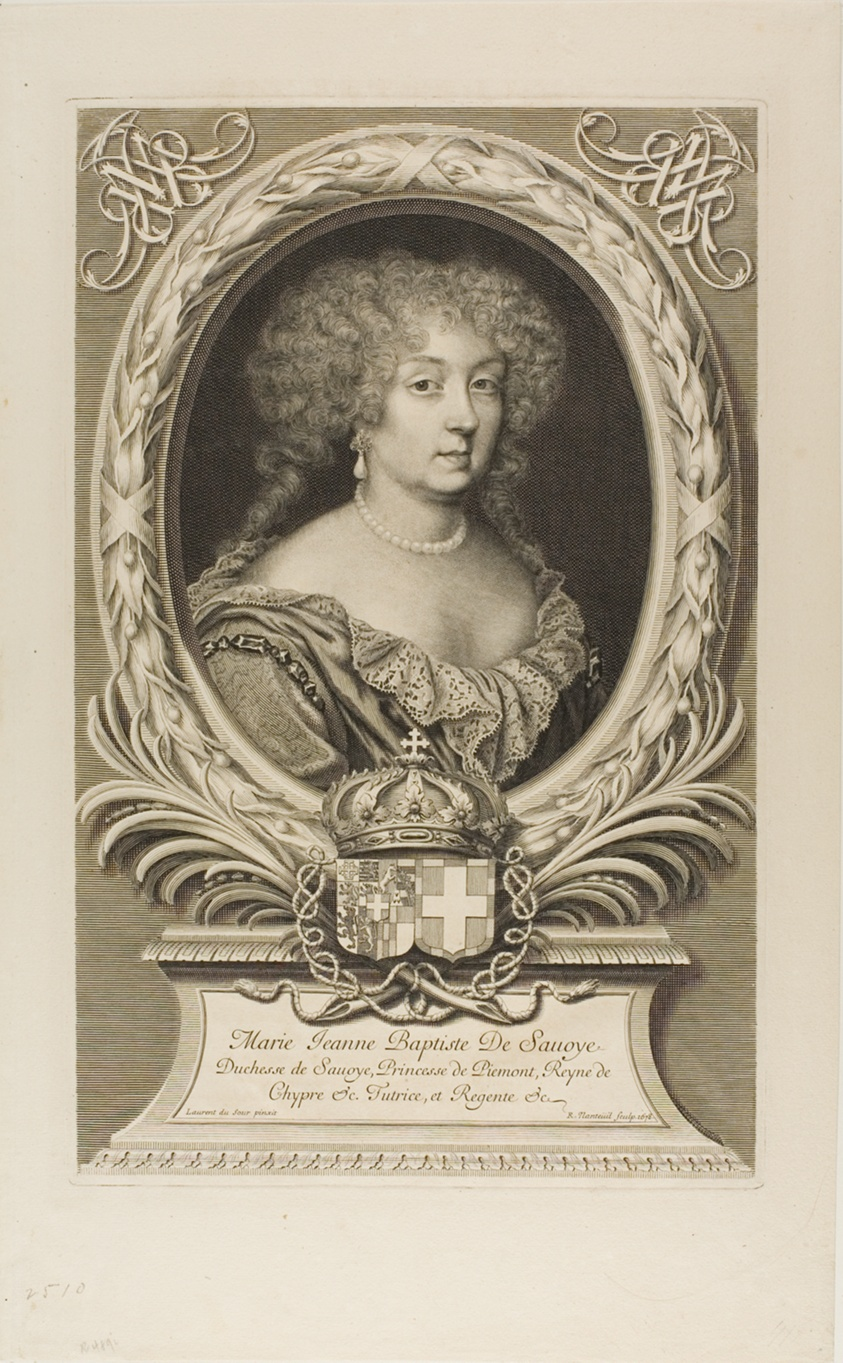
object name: Print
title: Marie Jeanne Baptiste, Duchess de Savoye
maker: Robert Nanteuil (French, 1623-1678)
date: 1678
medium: Engraving on paper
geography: France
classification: engraving; print; prints and drawing